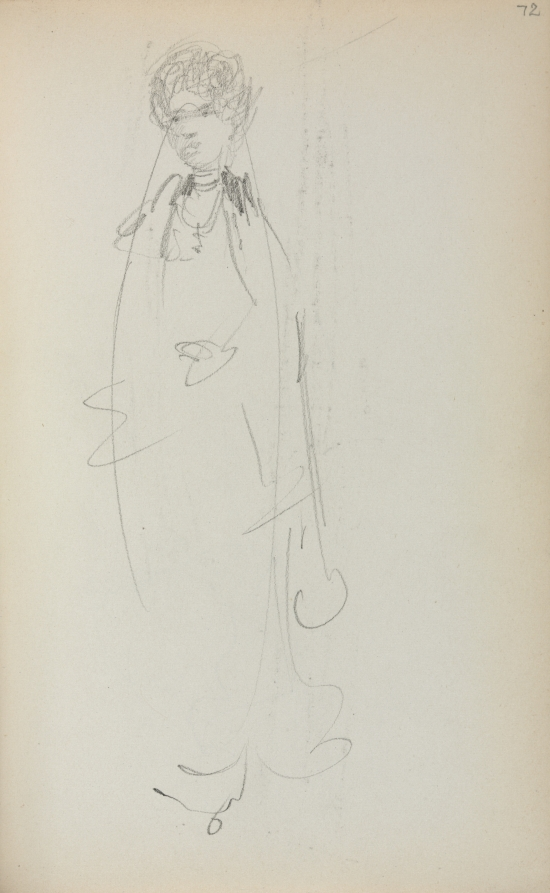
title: Italian Sketchbook: Standing Woman (page 72)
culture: America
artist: Maurice Prendergast (American, born Newfoundland [now Canada], 1858–1924)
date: 1898–1899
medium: pencil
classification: Bound Volume